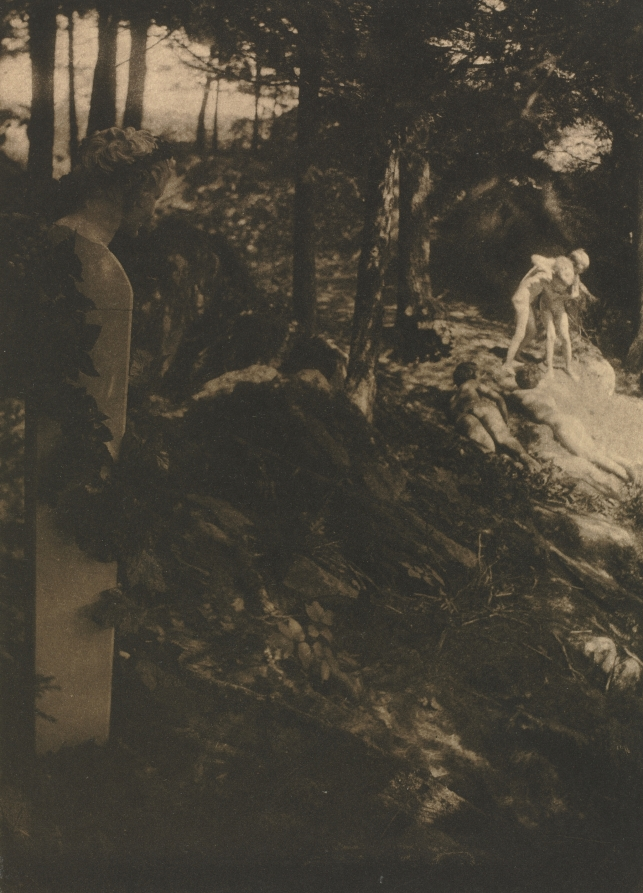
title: Camera Work: Boys Wrestling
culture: America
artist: Clarence H. White (American, 1871–1925)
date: 1908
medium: photogravure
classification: Bound Volume